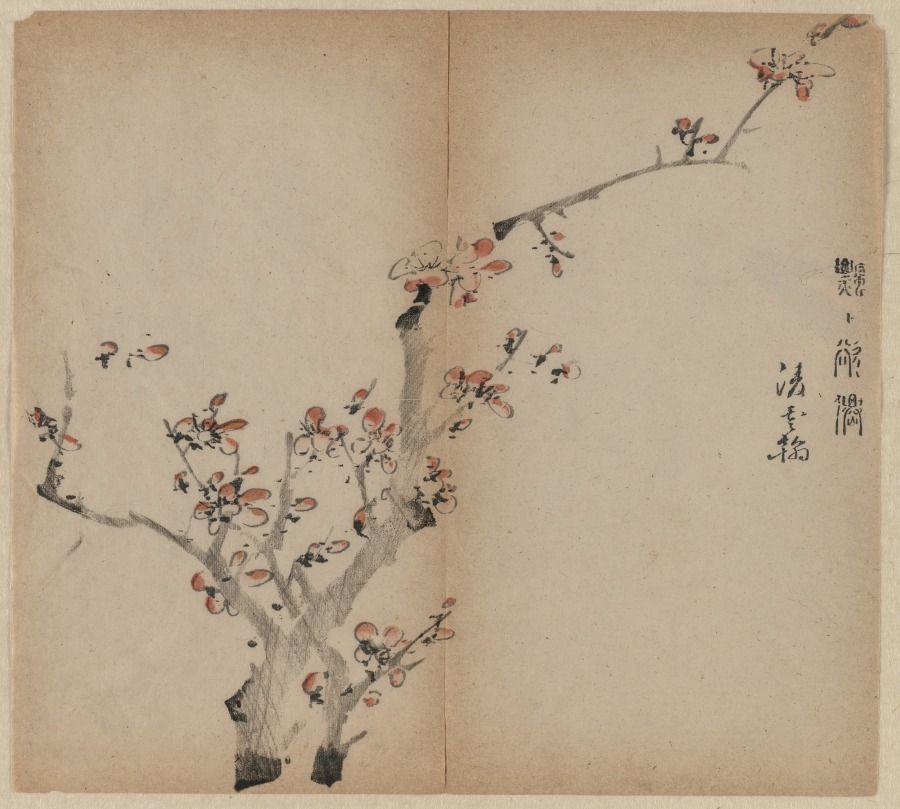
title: Peach Blossoms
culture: China, Qing dynasty (1644-1911)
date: 18th Century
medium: color woodblock print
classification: Print